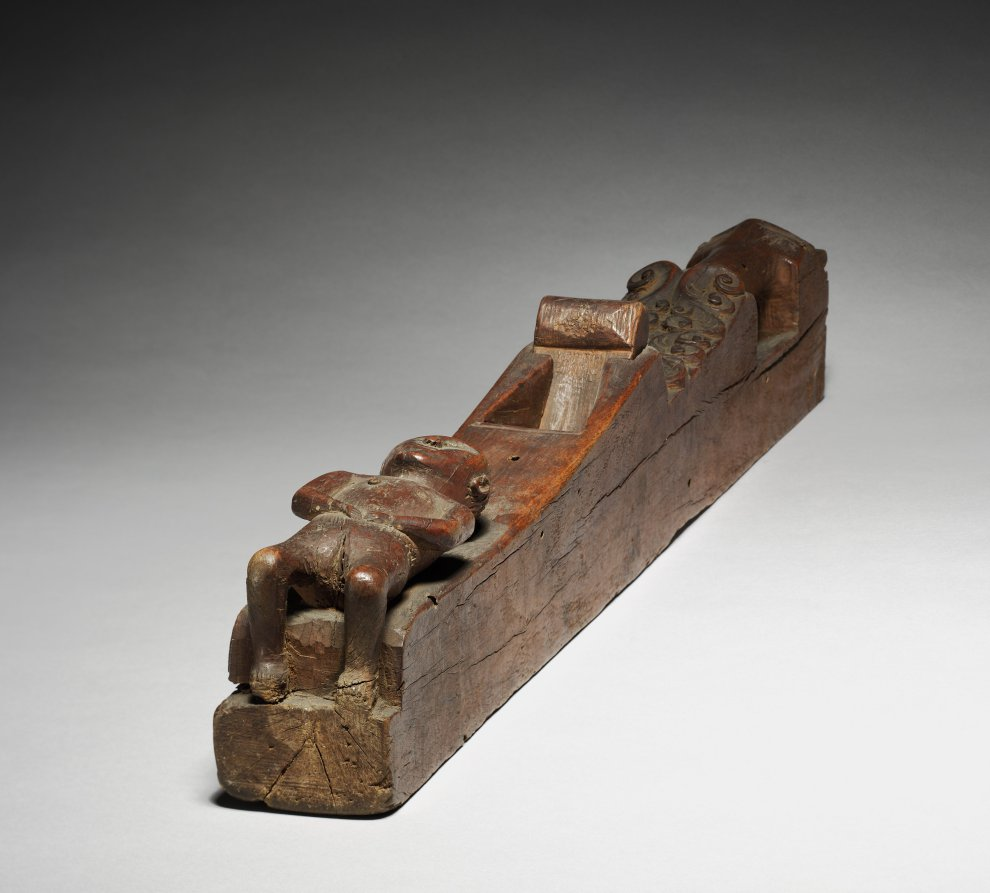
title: Plane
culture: Germany or Italy, 17th century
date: 1600s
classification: Tool